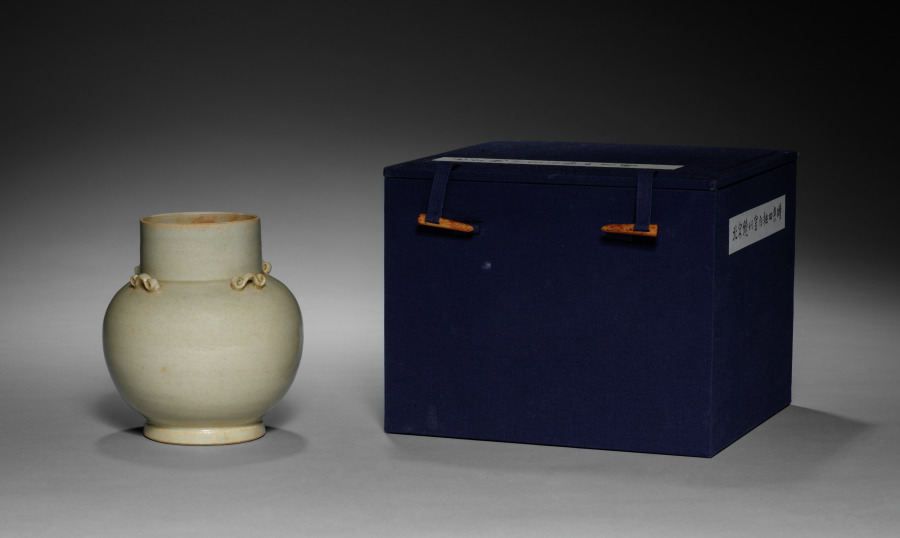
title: Globular Jar with Four Loops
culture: China, Southern Song dynasty (1127-1279)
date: 960–1279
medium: Porcelaneous ware of the qingbai type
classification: Ceramic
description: In the 900s, potters in southeast China excelled in producing white ceramics, including bluish-white (qingbai; 青白) glazed ware. The Keithleys’ jar was made when the qingbai ware–producing kilns were most active and manufactured their finest ware. The jar is missing its cover, which would have been flat with a loop in the center so that it could be tied in place with a string or silk cloth.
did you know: This container was probably used to store tea or grain.